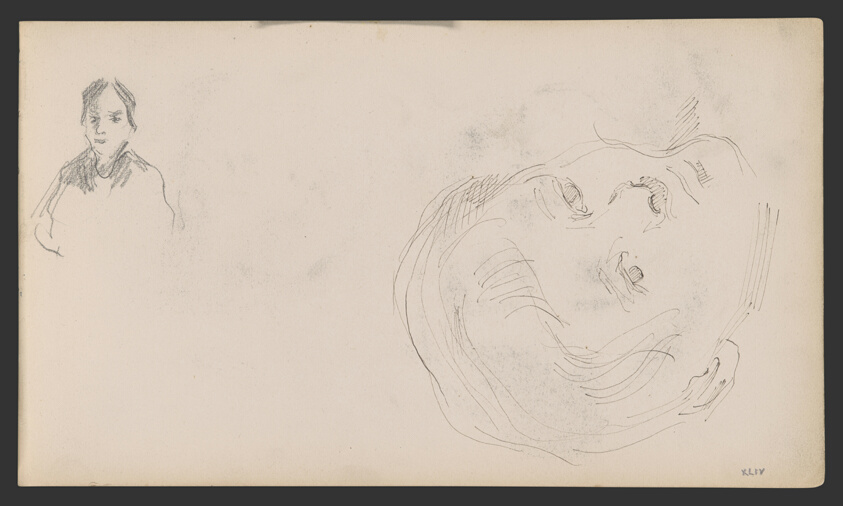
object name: Drawing and Watercolor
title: Sketchbook No. 2 (L'Estaque)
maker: Paul Cézanne; French, 1839-1906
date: 1875–86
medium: Graphite and pen and ink drawings on paper, bound into a book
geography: France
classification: sketchbook; graphite; prints and drawing; paper